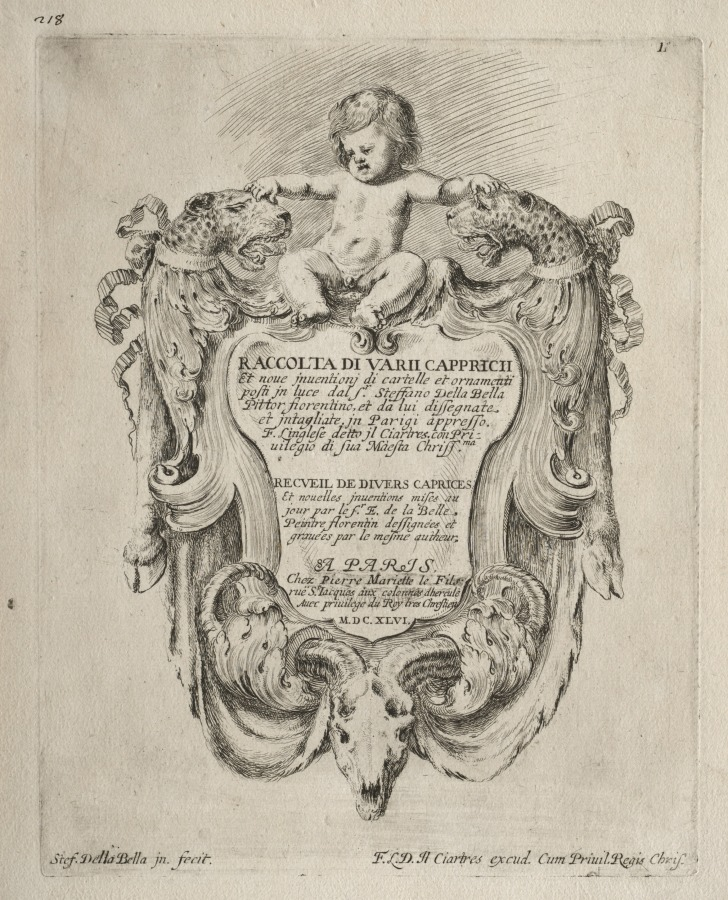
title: Collection of Various Caprices and New Designs of Cartouches and Ornaments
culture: Italy, 17th century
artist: Stefano Della Bella (Italian, 1610–1664)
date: 1646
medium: etching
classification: Print